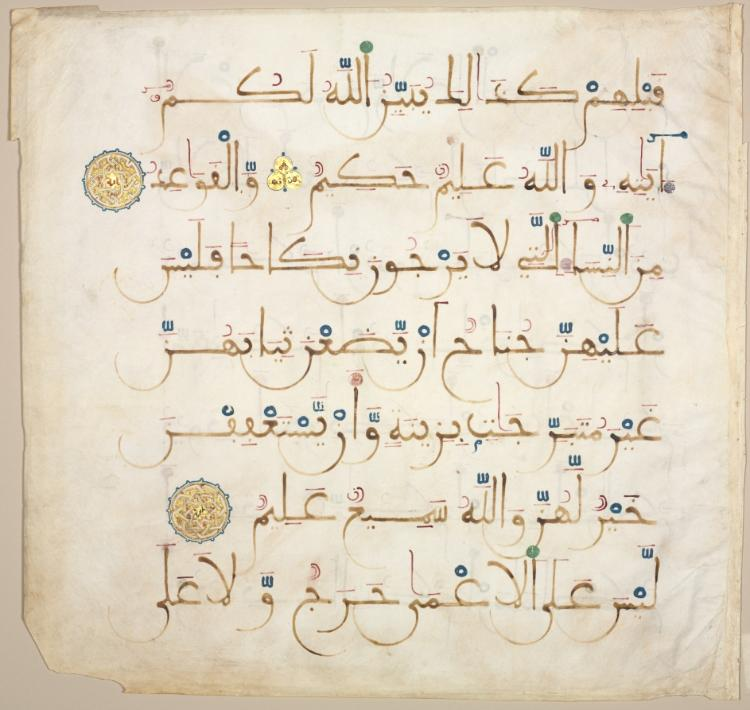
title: Qur'an Manuscript Folio (recto)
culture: Southern Spain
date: 1200s–1300s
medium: ink, gold, and color on parchment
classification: Manuscript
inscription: Sura al-Nur [Chapter: The Light] 24:part 59-part 61 (Arabic) Maghribi (seven lines to a page)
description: This page from the “Chapter of Light” (24:59–61) in the Qur'an is written in the monumental script of Islamic Spain and North Africa, known as Maghribi Kufic. Words flow rhythmically with curving flourishes toward the left margin where letters end in almost perfect semicircles, an elegant hallmark that contrasts with the upright shafts. Distinctive markings—vowels in red and diacritics in blue—identify the vocalization of the text, which would have been read or recited aloud to an assembly.